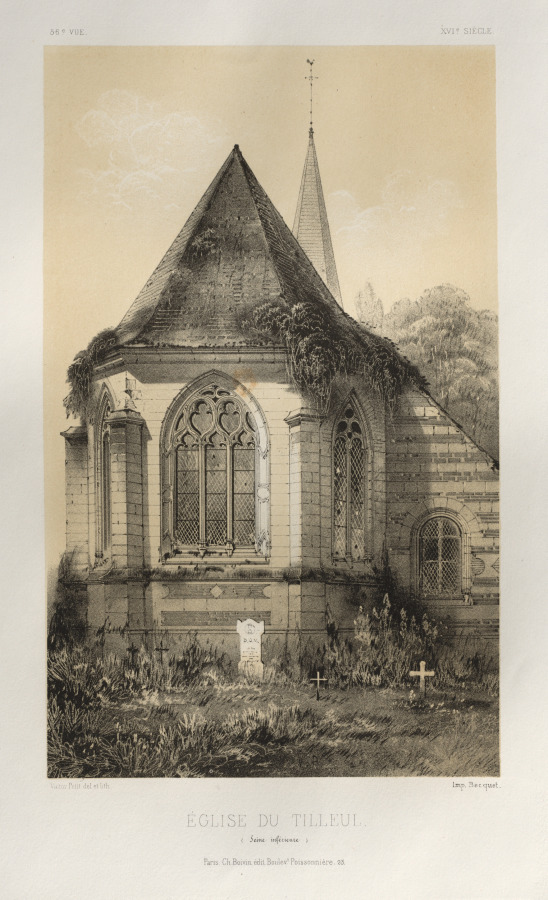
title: Architecture Pittoresque ou Monuments des XVeme. Et XVIeme. Siecles: Chateaux de France des XV et XVI Siecles: Pl. 56, Église Du Tilleul (Seine inférieure)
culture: France, 19th century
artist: Victor Petit (French, 1817–1874)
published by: Charles Boivin (publisher and editor); Lith de Godard a Paris (printer)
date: 1860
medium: lithograph with tint stone, from portfolio of 100 lithographs with tint stone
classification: Print